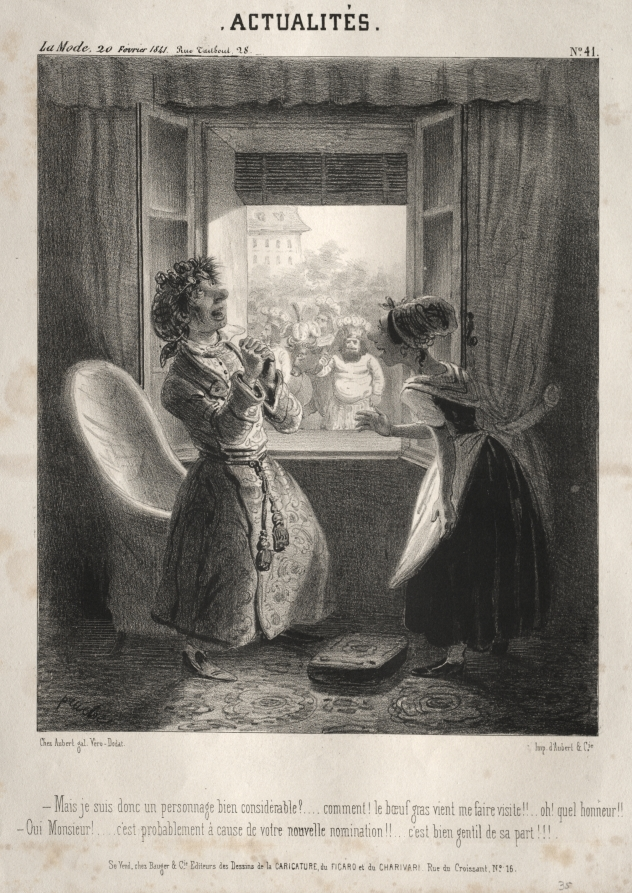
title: Actualités: ---Mais je suis donc un personnage bien considerable?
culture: France, 19th century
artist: Clémente Pruche (French, 1831–1870)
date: 1841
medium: lithograph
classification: Print